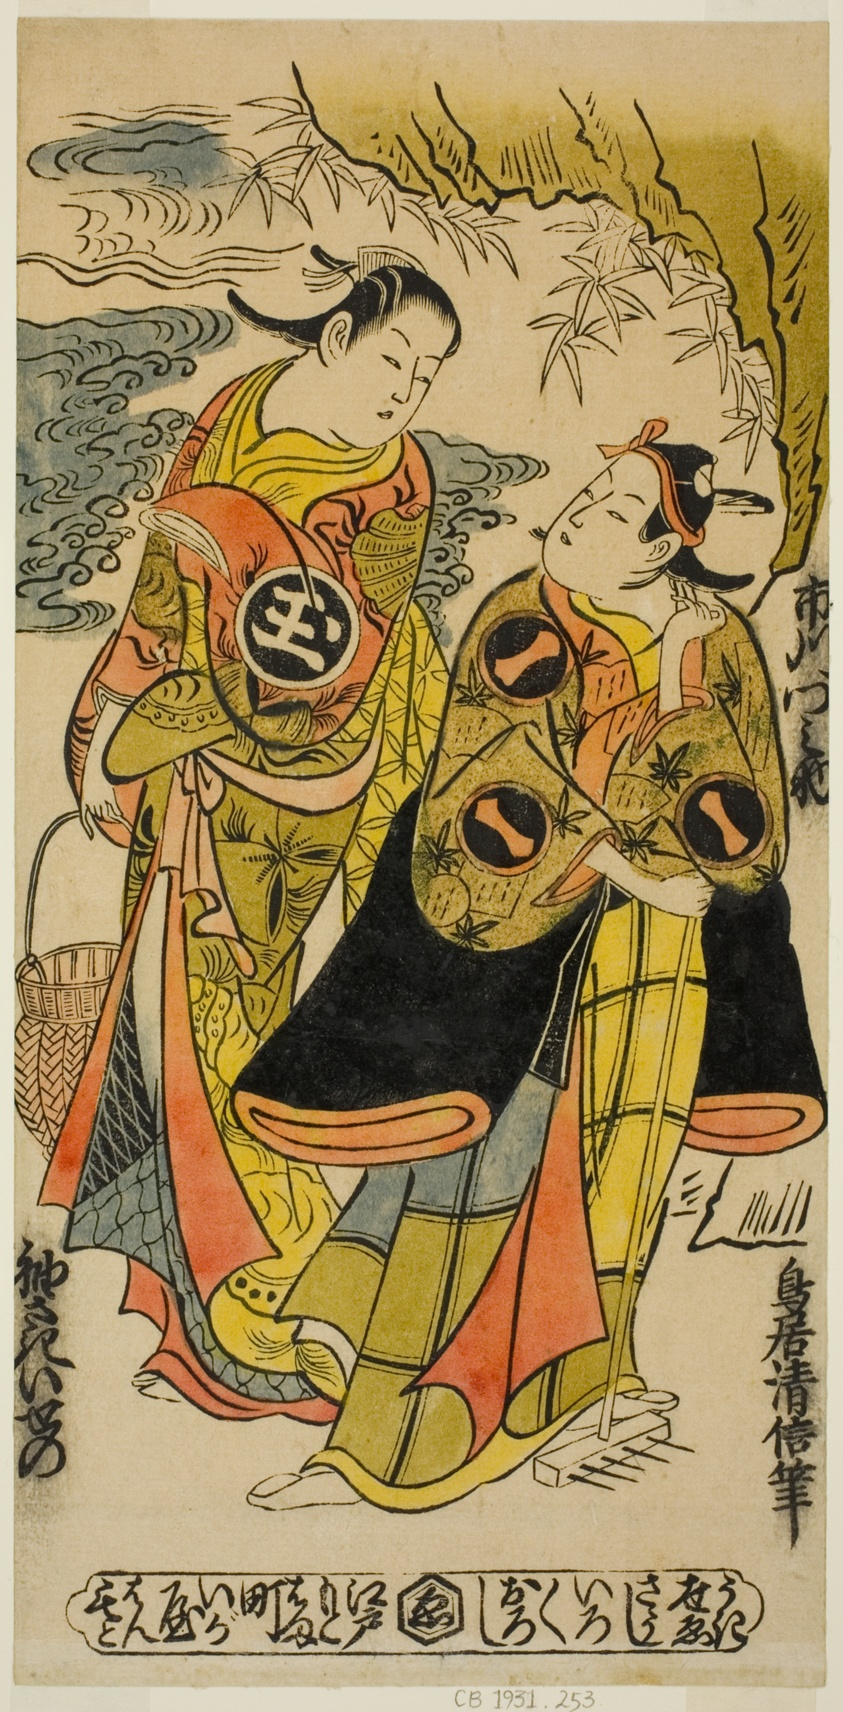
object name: Print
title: The Actors Ichikawa Monnosuke I as Minamoto no Yoshiie and Sodesaki Iseno I as Onoe no Mae in the play "Kaomise Junidan," performed at the Nakamura Theater in the eleventh month, 1726 (?)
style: Japanese (culture or style)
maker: Torii Kiyonobu II (Japanese, active c. 1725-61)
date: c. 1726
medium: Hand-colored woodblock print; hosoban, urushi-e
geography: Japan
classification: woodblock print; print; asian art